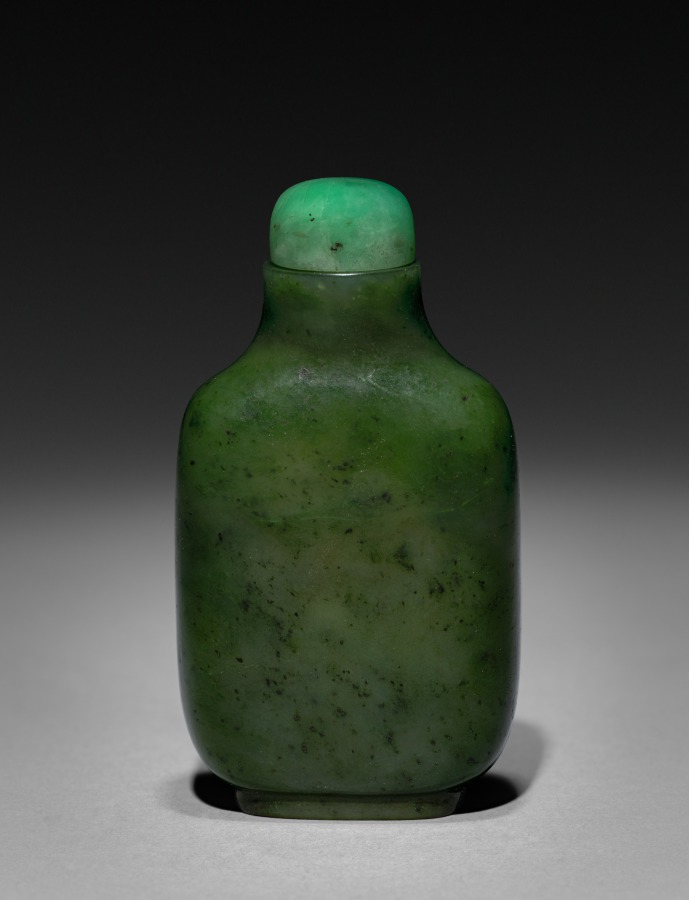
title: Snuff Bottle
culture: China, Qing dynasty (1644-1911)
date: 1644–1911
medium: glass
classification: Glass